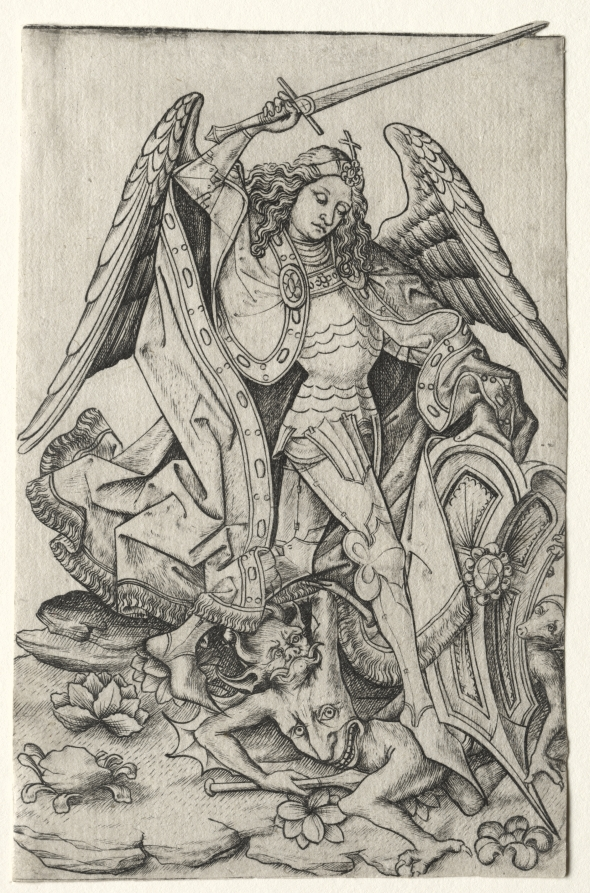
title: Saint Michael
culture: Germany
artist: Master ES (German, active 1450–67)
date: 1450–67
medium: engraving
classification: Print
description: Wearing gothic armor and a spectacular cape, the Archangel Michael prepares to strike down two demons with a broadsword. As the leader of the battle against Satan in Saint John’s vision of the Apocalypse, Michael exemplified the medieval belief that angels fought every day to protect people from sinful temptation, characterized here by the face leering from the devil’s belly directly at the viewer.